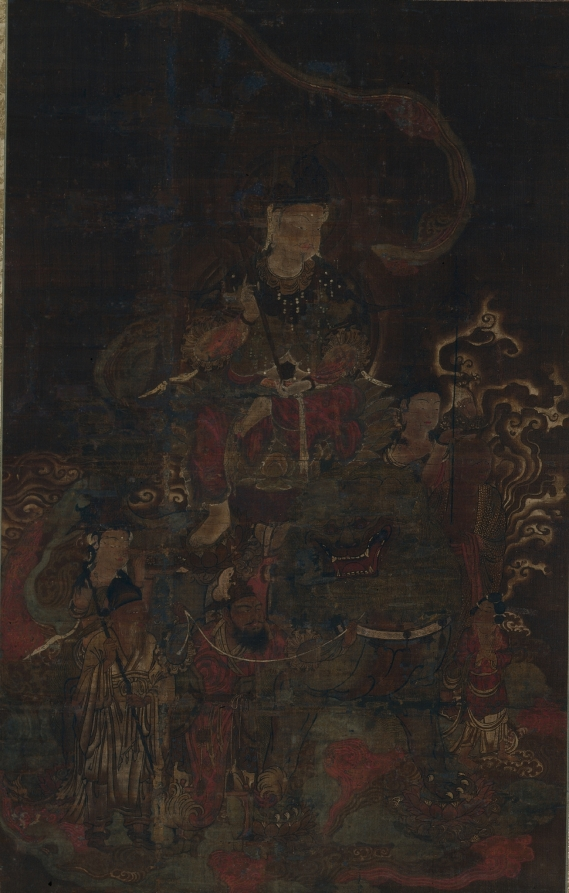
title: Monju Riding Lion with Attendants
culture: Japan, Kamakura period (1185–1333)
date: 1200s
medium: Hanging scroll; ink and color on silk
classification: Painting